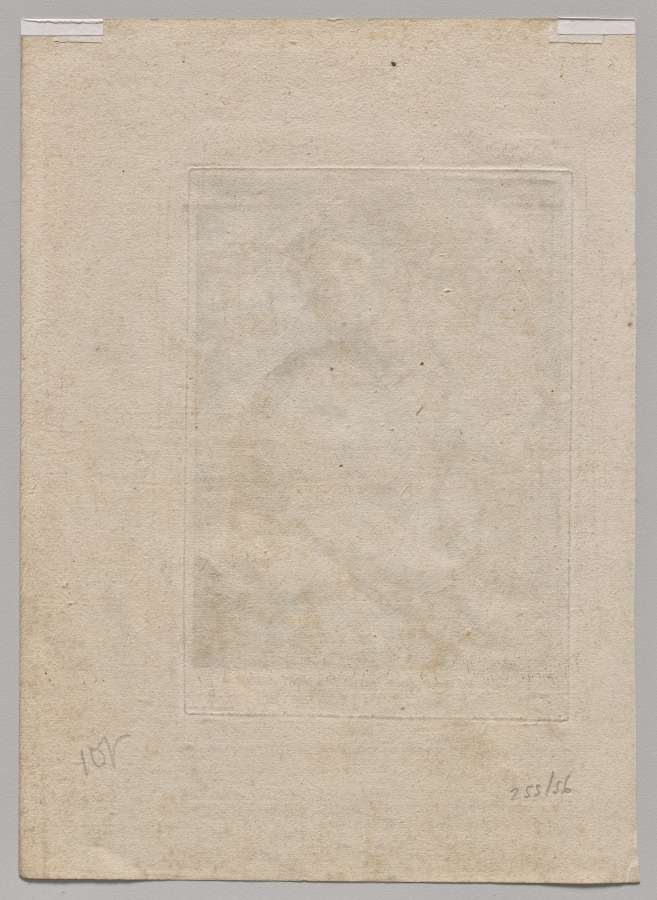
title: Plate 12: Benjamin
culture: Netherlands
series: The Twelve Sons of Jacob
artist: Jacob de Gheyn II (Netherlandish, 1565–1629)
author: after Karel I van Mander (Netherlandish, 1548–1606)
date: c. 1589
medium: engraving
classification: Print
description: In this print, the biblical figure Benjamin holds a wolf by a chain while an act of violence takes place behind him, denoting his ferocity in battle. This is one of a series of prints depicting the twelve sons of Jacob, each with an attribute and costume that denotes his character. According to the Old Testament, Jacob blessed each of his twelve sons, prophesizing the destiny of their tribe, and assigning them a parcel of land in Canaan. The print series was made in the Netherlands in the late 16th century, a time of political struggle when Old Testament heroes were popular exemplars of fortitude and patience.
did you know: The appearance of a wolf in this print illustrates the Old Testament prophesy of Jacob, that “Benjamin is a ravenous wolf; In the morning he devours the prey, And in the evening he divides the spoil (Genesis 49:28).